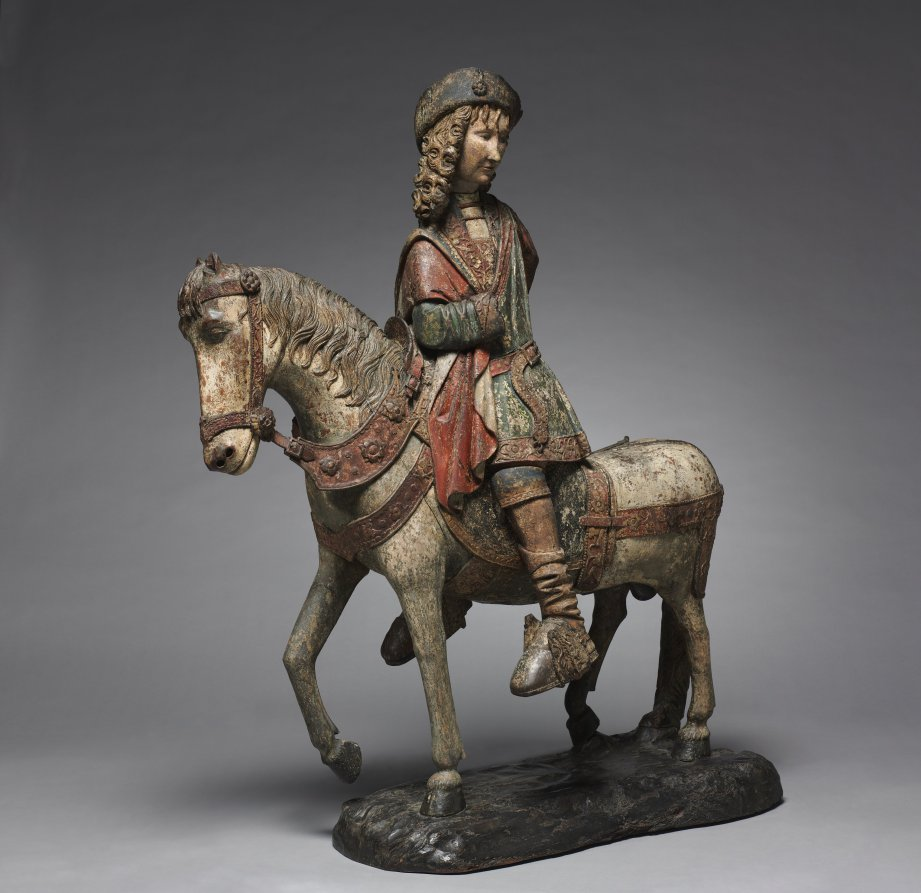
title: Saint Martin of Tours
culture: Northeast France or Flanders, 15th century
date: c. 1480–1500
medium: polychromed walnut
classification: Sculpture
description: According to tradition, Saint Martin was born during the reign of Constantine the Great (306–37 CE) and served as a member of the Roman cavalry in Gaul. There he earned a reputation for humility and boundless charity. During the severe winter of 322 CE at Amiens, Martin's compassion for others led him to divide his cloak with his sword, and to give half to a poor, naked beggar. This event, along with Martin's subsequent vision of the beggar as Christ, eventually led to the saint's widespread popularity throughout medieval Europe. Saint Martin was particularly venerated in the city of Tours where he served as bishop, where his tomb is located, and of which he remains the patron saint.